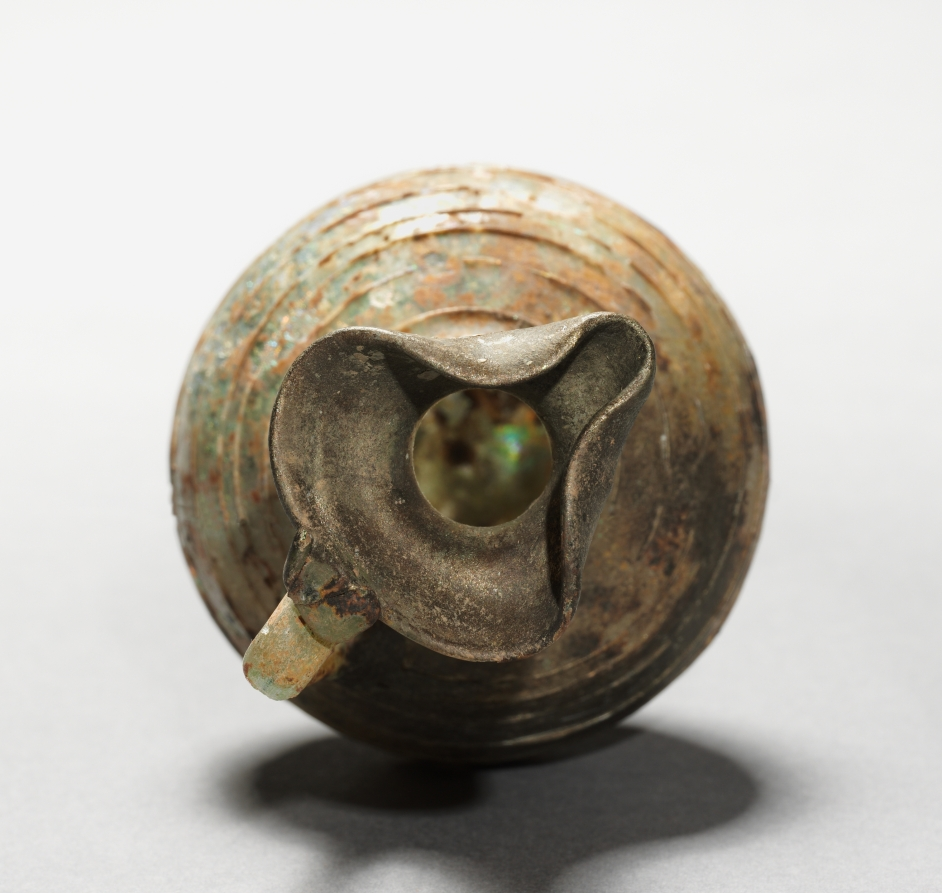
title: Pitcher with Handle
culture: Roman, Eastern Mediterranean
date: 100–400 CE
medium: glass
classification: Glass